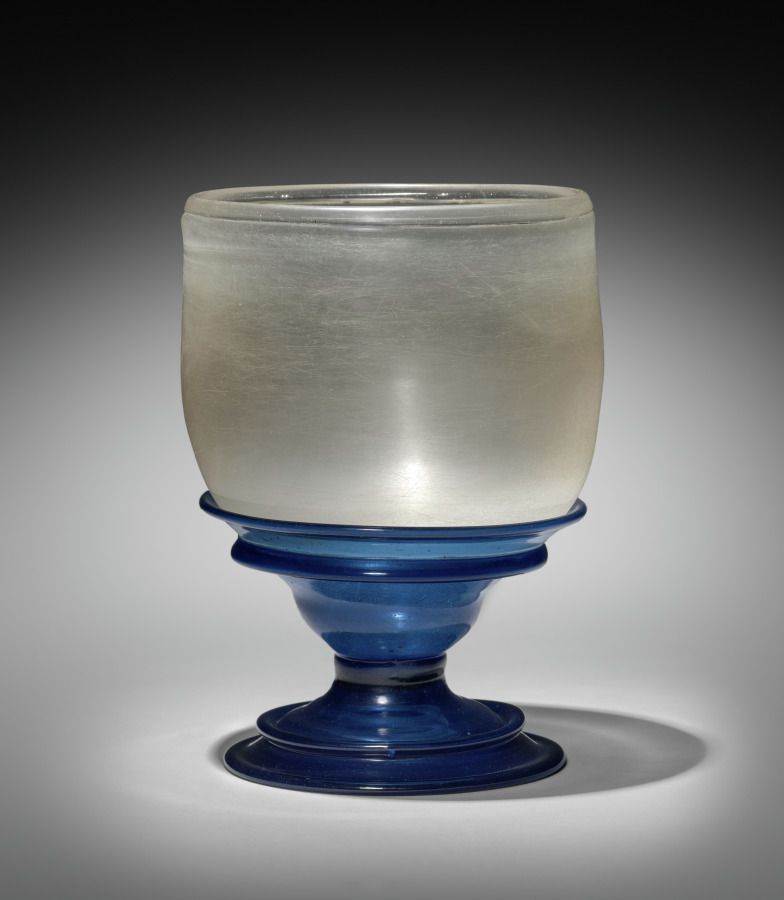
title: Bowl with Stand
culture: Syria, Roman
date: 100–400 CE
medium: glass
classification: Glass